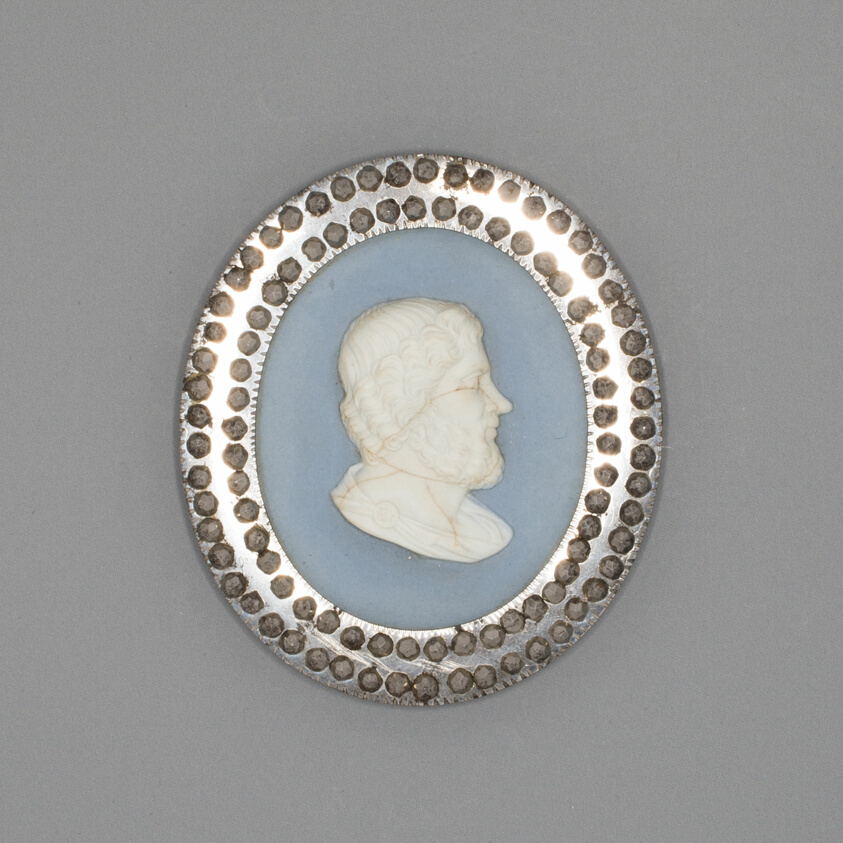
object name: Ceramics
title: Medallion with Aristippus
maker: Wedgwood Manufactory (England, founded 1759)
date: Late 18th century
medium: Stoneware (jasperware)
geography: Burslem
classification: sculpture; stoneware; european decorative arts; ceramics